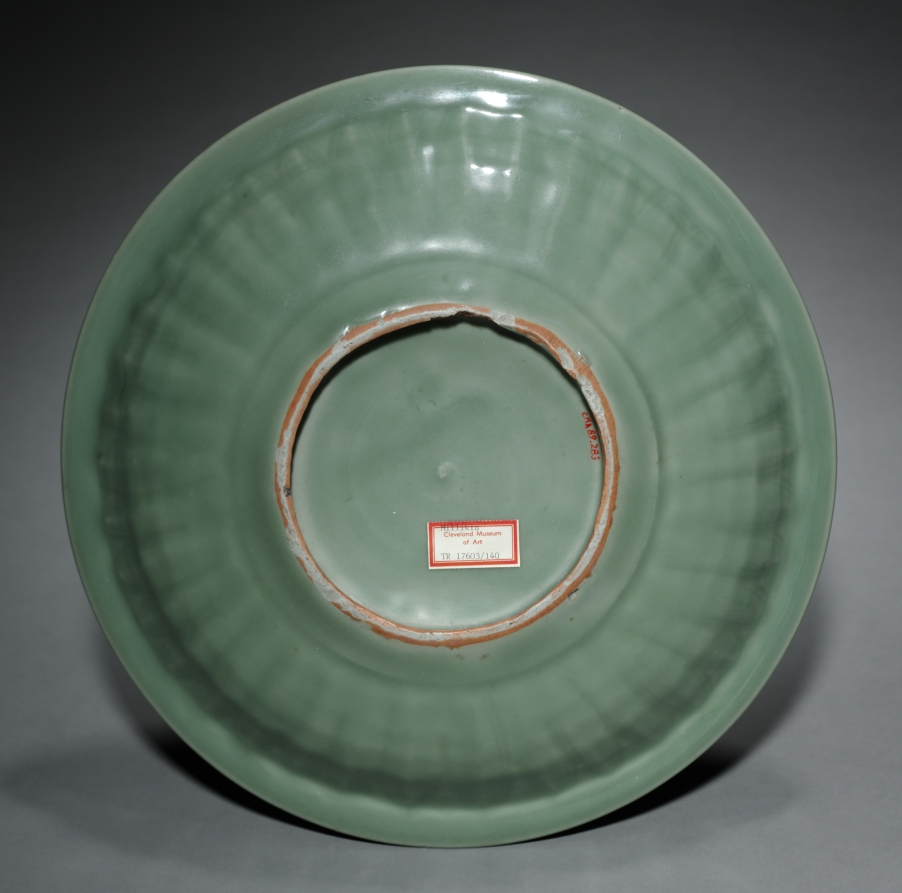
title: Dish with Dragon Pursuing Flaming Jewel in Relief: Longquan Ware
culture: China, Zhejiang province, Yuan dynasty (1271-1368)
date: early 14th Century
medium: glazed porcelain with molded decoration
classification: Ceramic